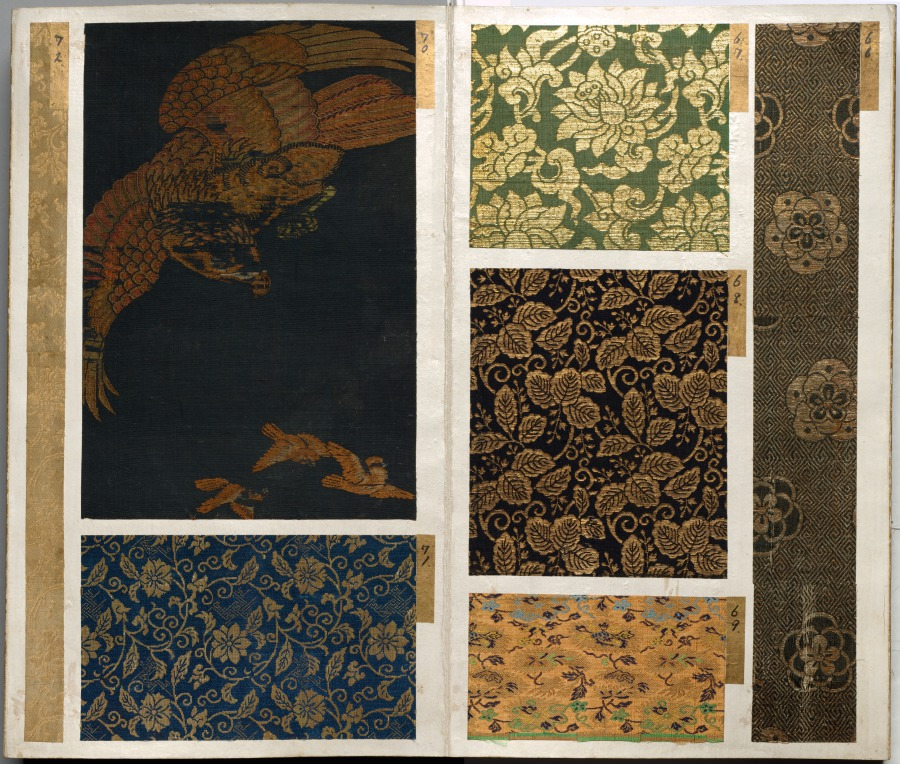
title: Album of Textile Samples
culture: Japan, Edo period (1615–1868)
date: 1600s-1700s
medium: silk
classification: Textile